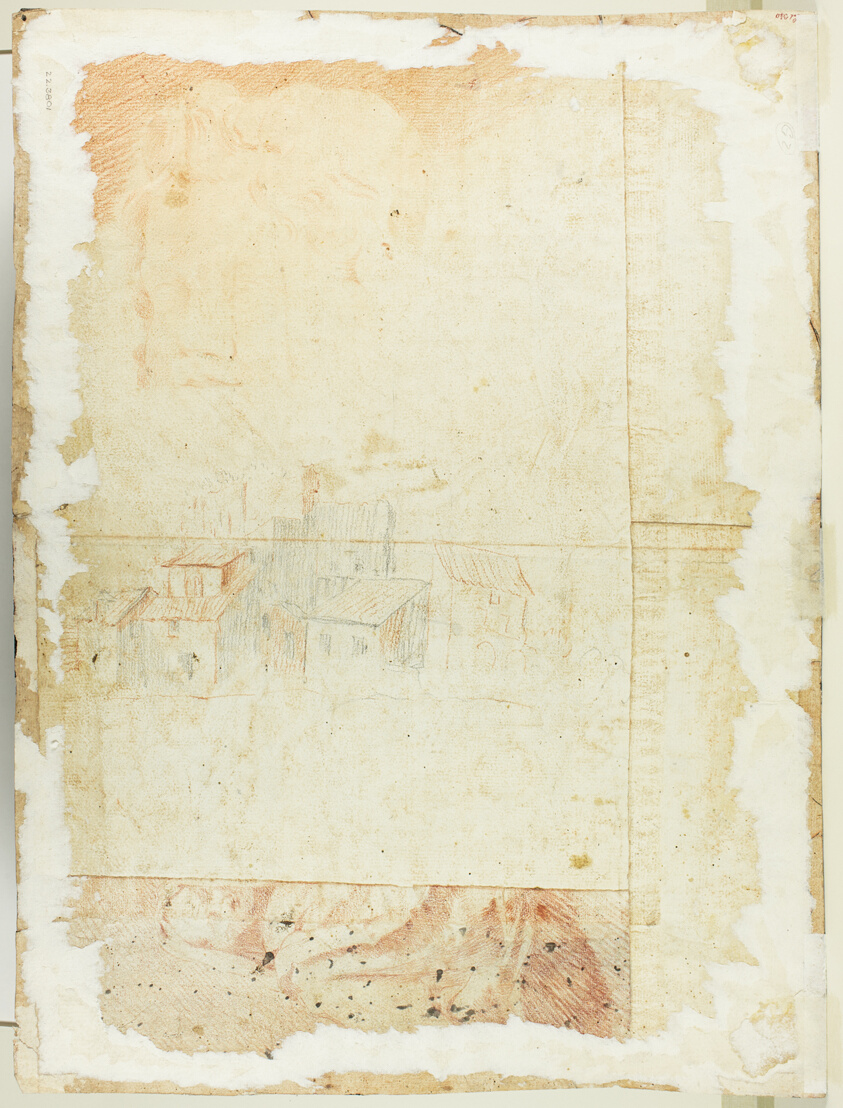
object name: Drawing and Watercolor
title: Large Ruined Portico or Corridor (recto); Sketches of a Draped Figure and Architecture (verso)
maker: School of Paul Bril (Flemish, 1554-1626)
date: c. 1600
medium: Brush and black ink, with black wash (recto), and red and black chalk (verso), on pieced cream laid paper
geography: Flanders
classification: ink or chalk wash; drawings (visual works); prints and drawing